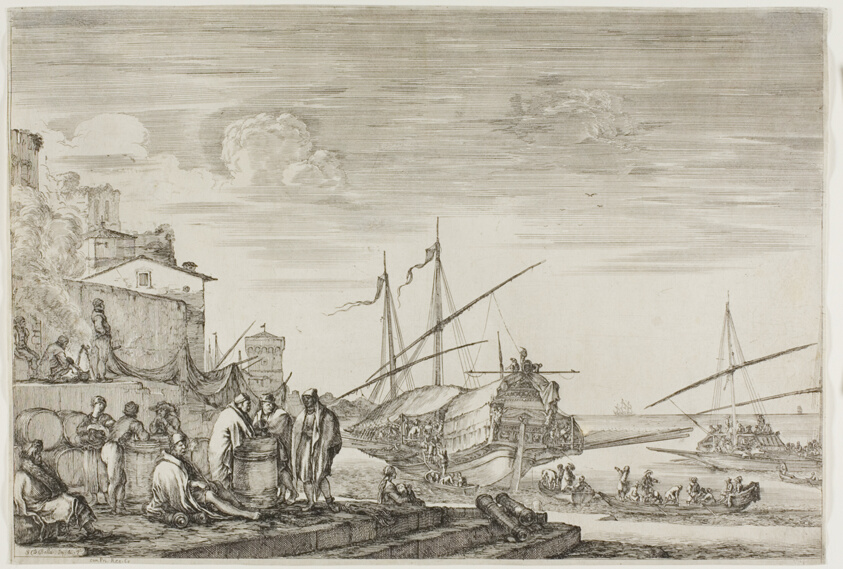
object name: Print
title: Houses Overlooking a Port, from Views of the Port of Livorno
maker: Stefano della Bella (Italian, 1610-1664)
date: 1654/55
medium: Etching on paper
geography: Italy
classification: etching; print; prints and drawing